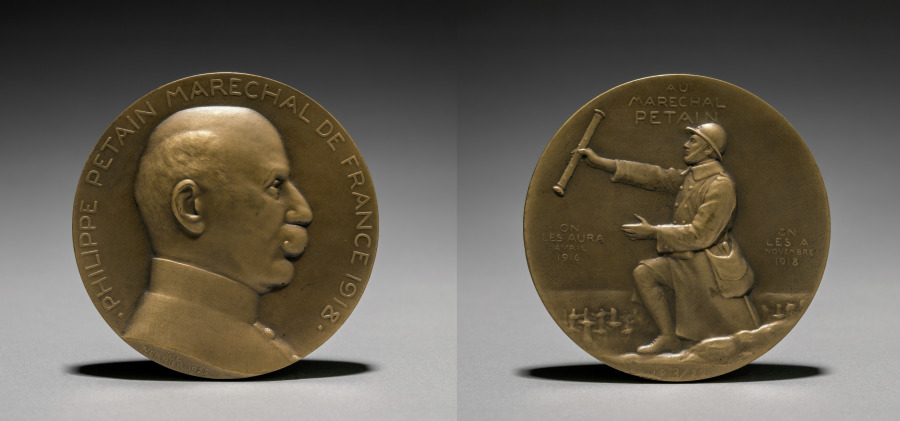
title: Petain Medal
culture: France, early 20th century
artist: Èmile Séraphin Vernier (French, 1852–1927)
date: 1922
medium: bronze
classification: Metalwork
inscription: obverse - "Philippe Petain Marechal de France, 1918." reverse - "AU MARECHAL PETAIN. ON LES AURA AVRIL 1916. ON LES A NOVEMBRE 1918."